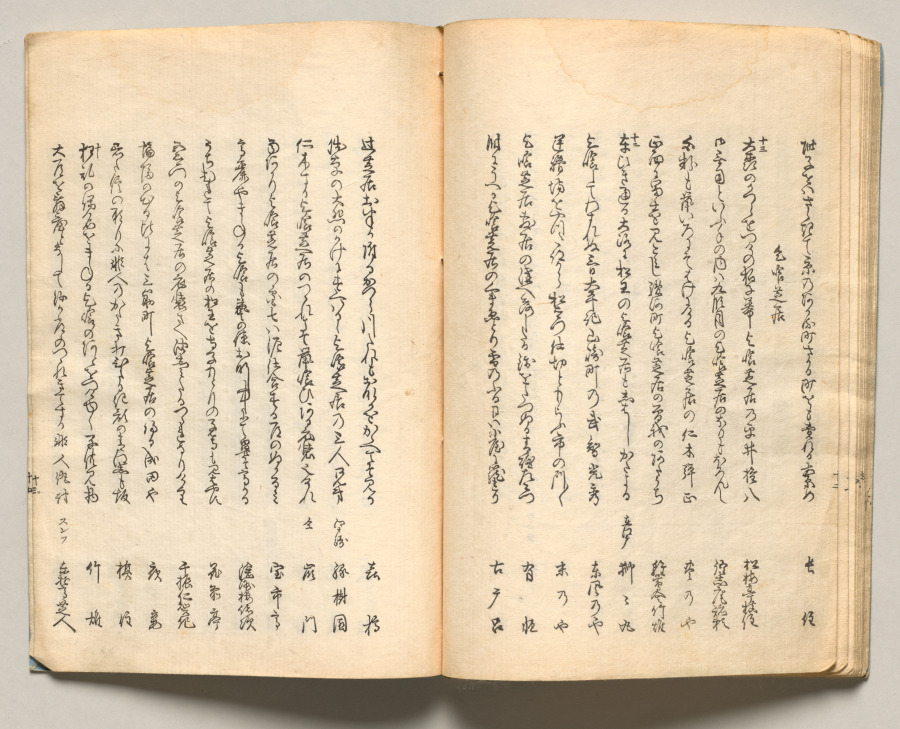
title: Spread Twenty from Volume Three of People of Japan in Light Verse (Kyōka)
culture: Japan, Edo period (1615–1868)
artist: Utagawa Hiroshige (Japanese, 1797–1858)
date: 1857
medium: Woodblock-printed book; ink and color on paper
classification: Bound Volume